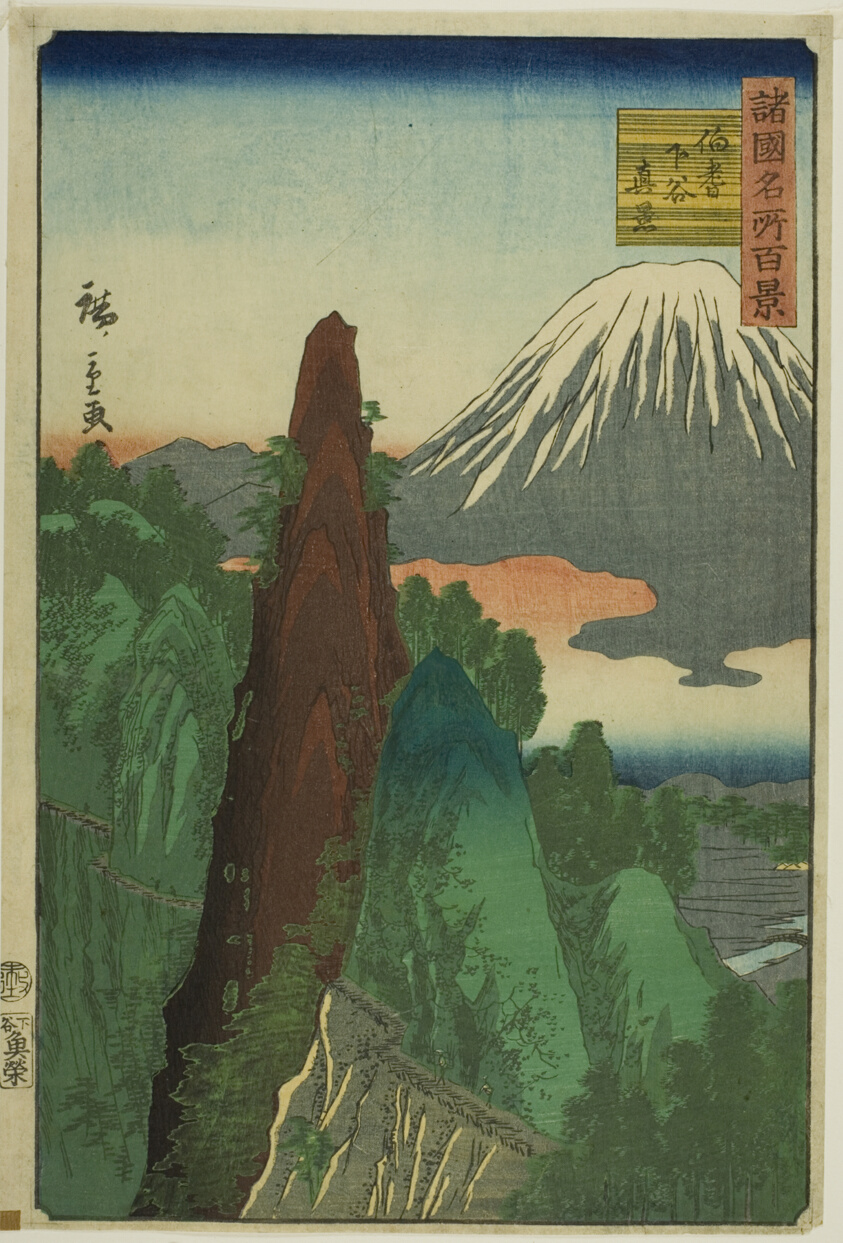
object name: Print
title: Actual View of Shimotani, Hoki Province (Hoki Shimotani shinkei), from the series “One Hundred Famous Views in the Various Provinces (Shokoku meisho hyakkei)”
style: Japanese (culture or style)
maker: Utagawa Hiroshige II (Shigenobu) (Japanese, 1826–1869)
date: 1859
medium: Color woodblock print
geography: Japan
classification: woodblock print; print